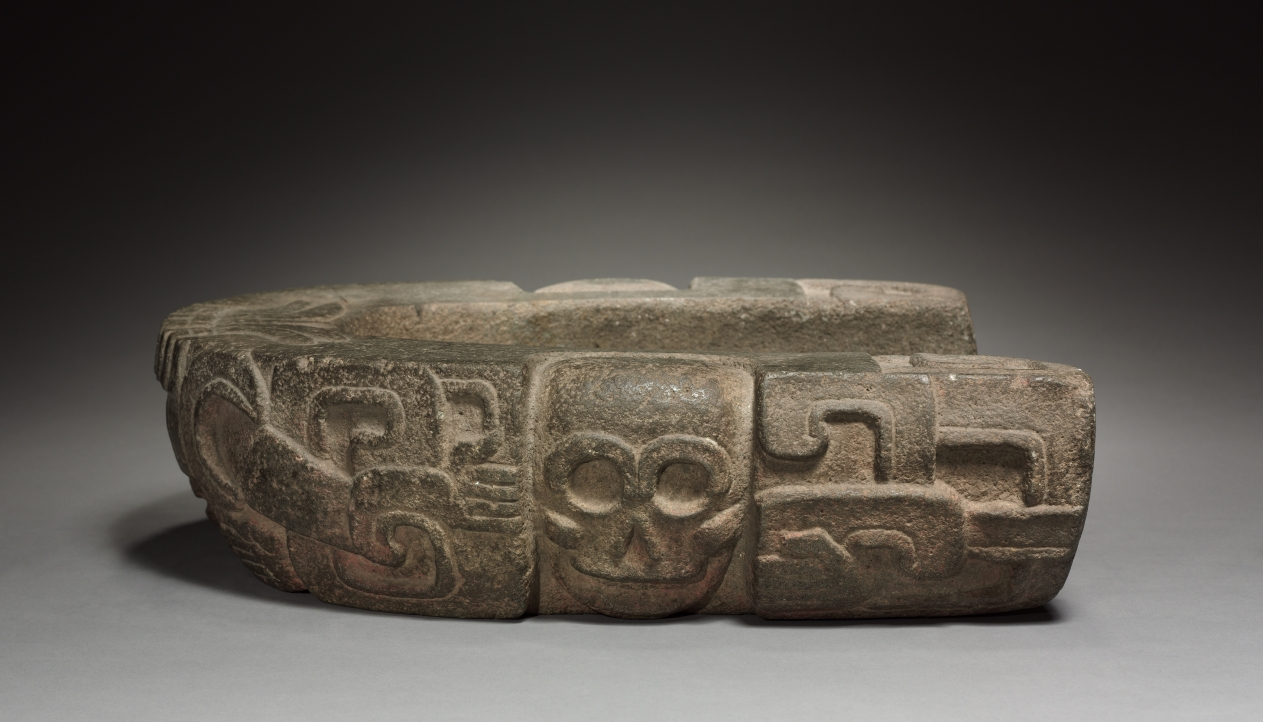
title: Yoke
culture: Mexico, Classic Veracruz Style, 7th-10th Century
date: c. 600–900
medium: stone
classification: Sculpture